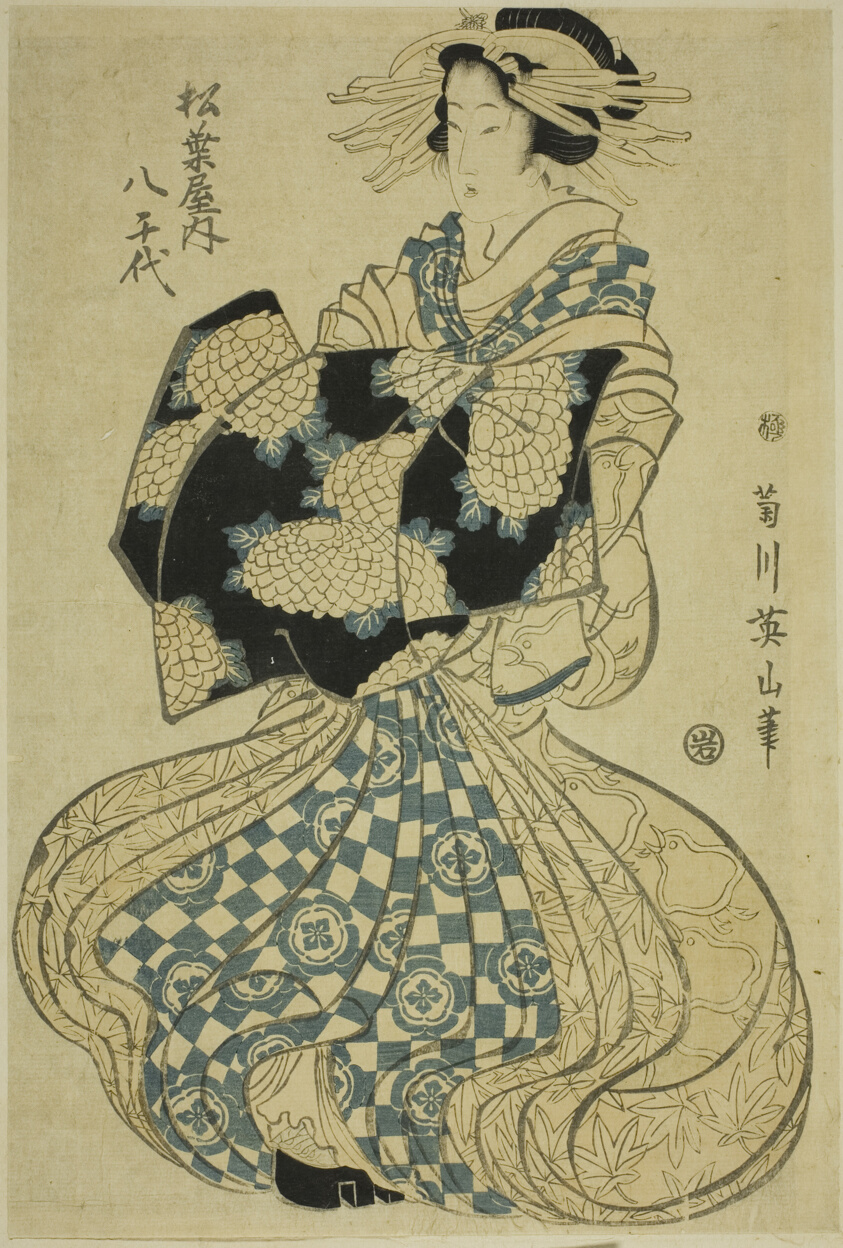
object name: Print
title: The courtesan Yachiyo of Matsubaya, from an untitled series of courtesans on parade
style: Japanese (culture or style)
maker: Kikukawa Eizan (Japanese, 1787-1867)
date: c. 1814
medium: Color woodblock print; oban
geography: Japan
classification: woodblock print; print; asian art